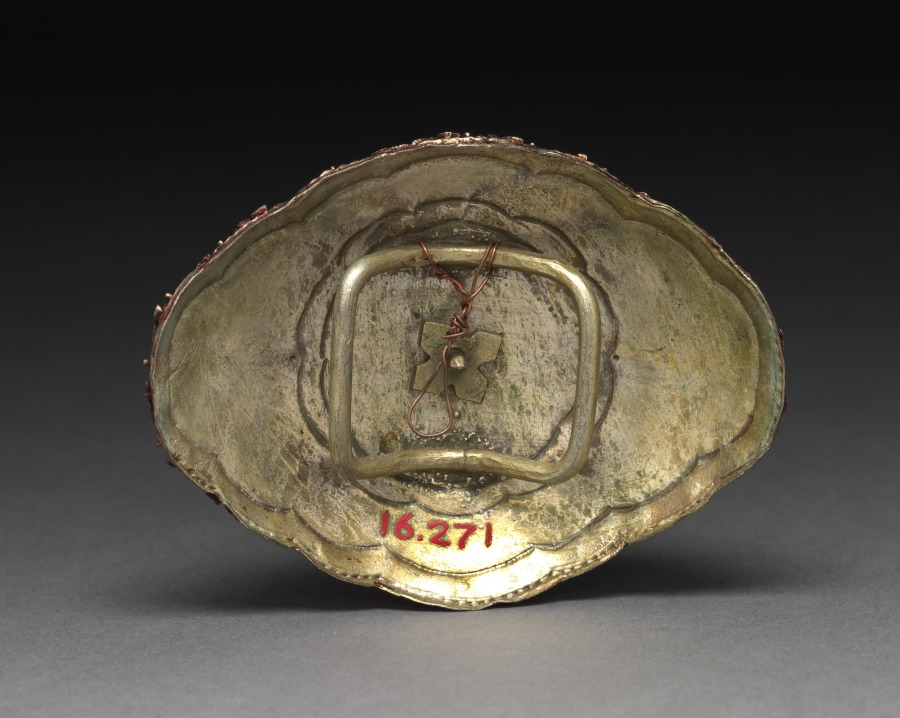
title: Medallion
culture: Siam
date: 1800s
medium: silver and cloisonné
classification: Jewelry